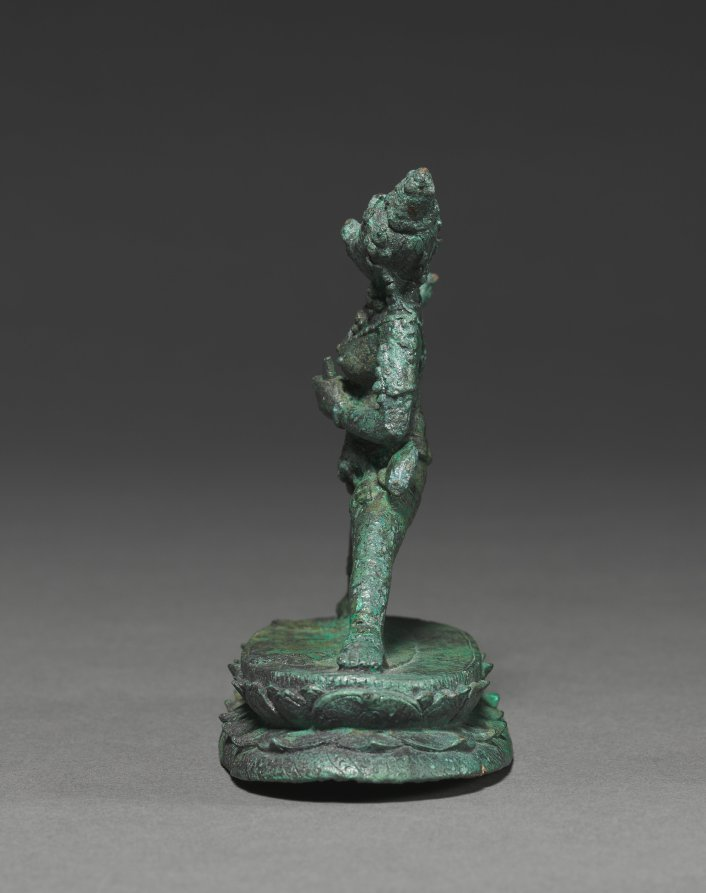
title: Varahi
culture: Java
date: 800s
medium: bronze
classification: Sculpture